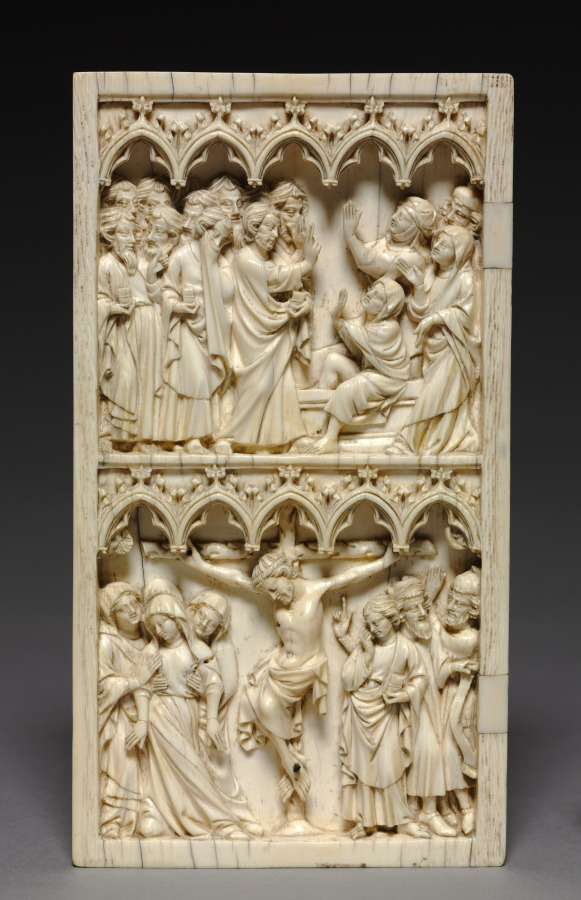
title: Diptych with Scenes from the Life of Christ (left wing: Raising of Lazarus and Crucifixion)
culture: Germany, Thuringia or Saxony, 14th century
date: c. 1350–1375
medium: ivory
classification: Ivory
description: Ivory diptychs (two panels hinged together) were used for private devotion by their aristocratic owners. The scenes represented here are Christ’s Entry into Jerusalem, the Raising of Lazarus, the Crucifixion, and Christ’s Entombment. They suggest choices made by the original owner who wished to contemplate these aspects of Christ’s passion.